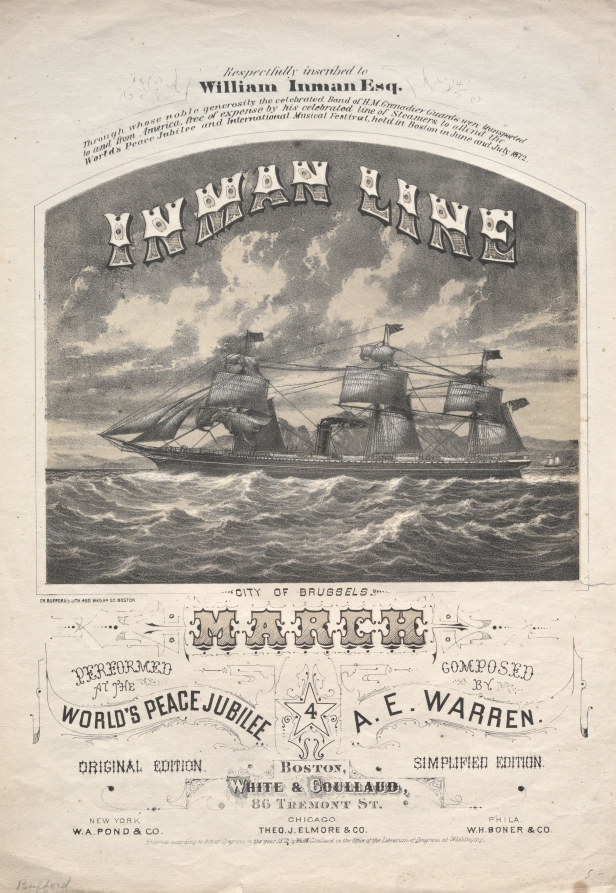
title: Inman Line March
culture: America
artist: J. H. Bufford (American, 1810–1870)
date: 1872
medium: lithograph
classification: Print